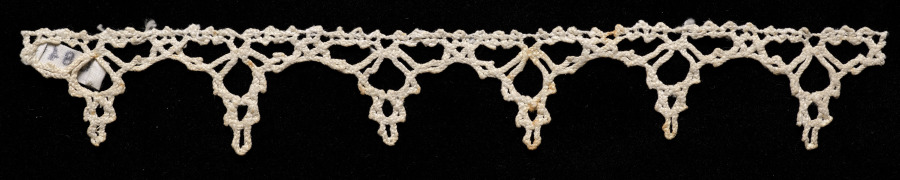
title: Lace Edging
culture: Italy, Venice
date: 1540–60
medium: Bobbin lace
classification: Lace